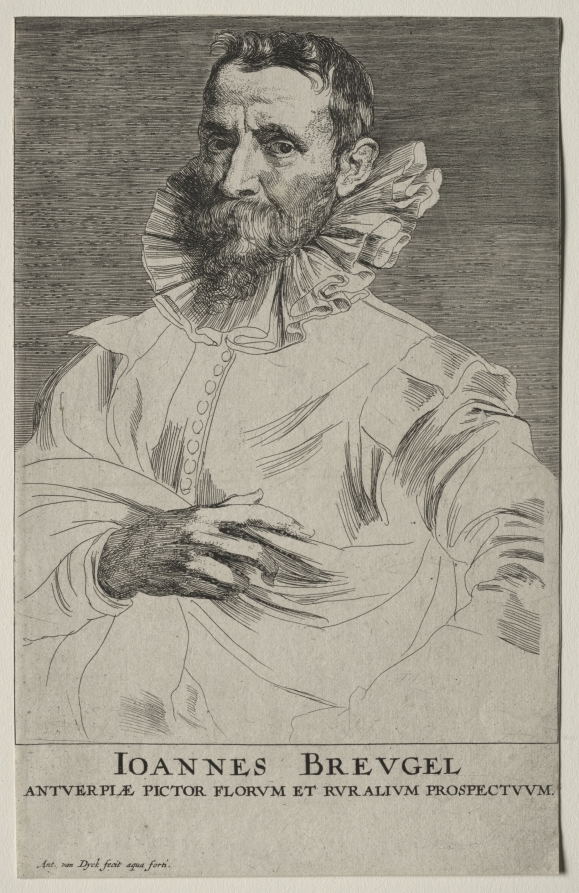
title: Jan Brueghel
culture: Flanders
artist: Anthony van Dyck (Flemish, 1599–1641)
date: 1630–33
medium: engraving and etching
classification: Print